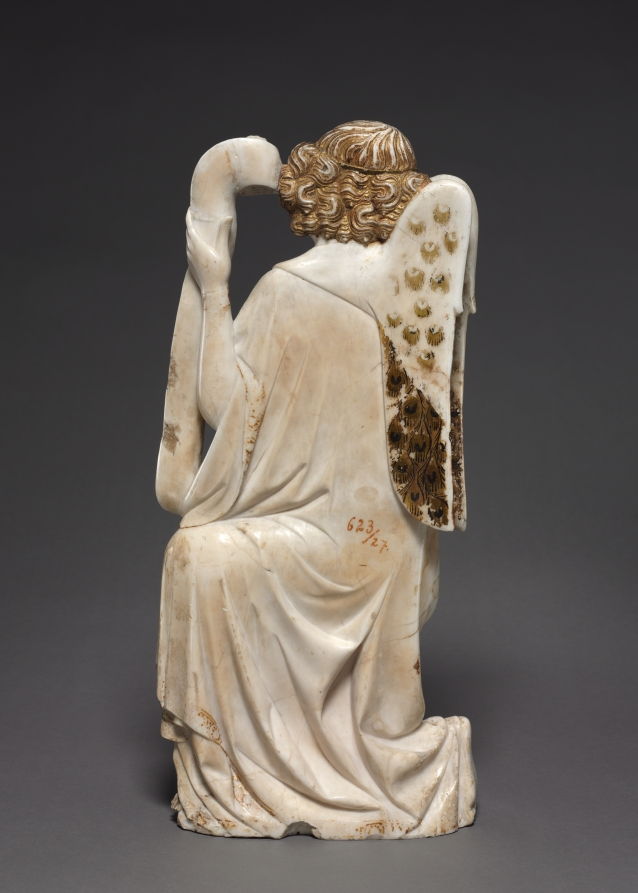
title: The Archangel Gabriel from an Annunciation Group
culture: France, Champagne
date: c. 1350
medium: alabaster with traces of paint and gilding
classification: Sculpture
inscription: Ave Maria, Gratia Plena.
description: In France, the use of alabaster began in the late 1200s for funerary monuments. The Archangel Gabriel, together with its counterpart, the Virgin Mary (now in the Louvre Museum, Paris) is part of an Annunciation. This is a rare example of alabaster sculpture from the 1300s. The alabaster comes from a quarry near Malaucène in Provence (France), making it an instance of long-distance trade of the rare material. Although the figure is very flat, it was likely made to also be viewed from the back, where there are remnants of gilding and the peacock feathers of the angel’s wing.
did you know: The surface of alabaster works can vary. By differentiating the intensity of polishing, it is possible for sculptures to create a surface with varying degrees of luster, or shine.